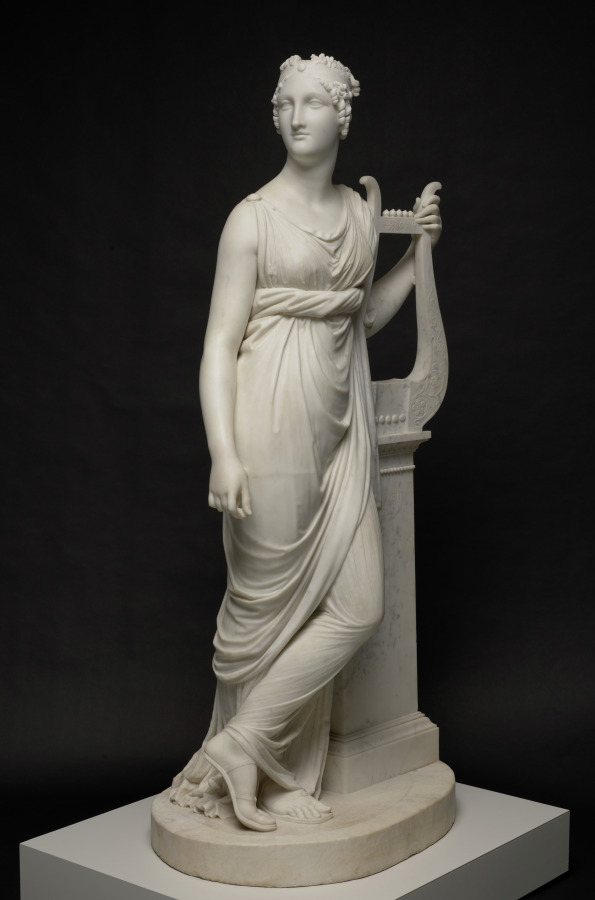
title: Terpsichore Lyran (Muse of Lyric Poetry)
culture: Italy, 19th century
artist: Antonio Canova (Italian, 1757–1822)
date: 1816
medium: marble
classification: Sculpture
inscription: inscribed on front of column: "Terpsichore Lyran" [Terpsichore as the Muse of lyric poetry]; inscribed at base of column: "Canova Fact: 1816"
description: In Greek mythology, Terpsichore was one of the nine Muses, or goddesses of creative inspiration. The lyre, the Greek inscription on the short column, and the caduceus (entwined snakes) on the side identify the figure as Terpsichore Lyran, muse of lyric poetry. This sculpture began with a commission from Napoleon's brother, Lucien, for an idealized portrait of his wife, Alexandrine. Antonio Canova made this version for a British aristocrat and exhibited it in 1817 at the Royal Academy in London to great acclaim.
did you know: Trained by his grandfather, an Italian stonemason, Canova began modeling clay and carving marble sculptures before age ten.